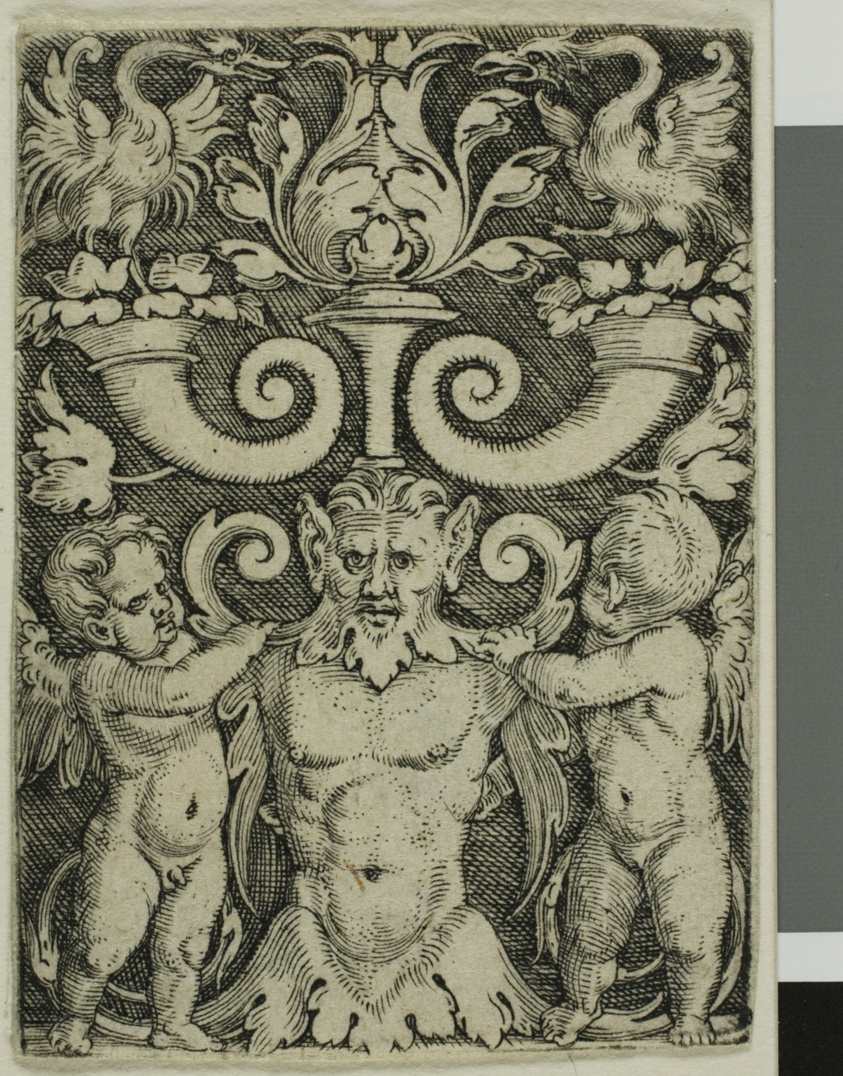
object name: Print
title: Ornament with a Male Half-Length Between Two Genii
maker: Barthel Beham (German, 1502-1540)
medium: Engraving in black on ivory laid paper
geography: Germany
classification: engraving; print; prints and drawing